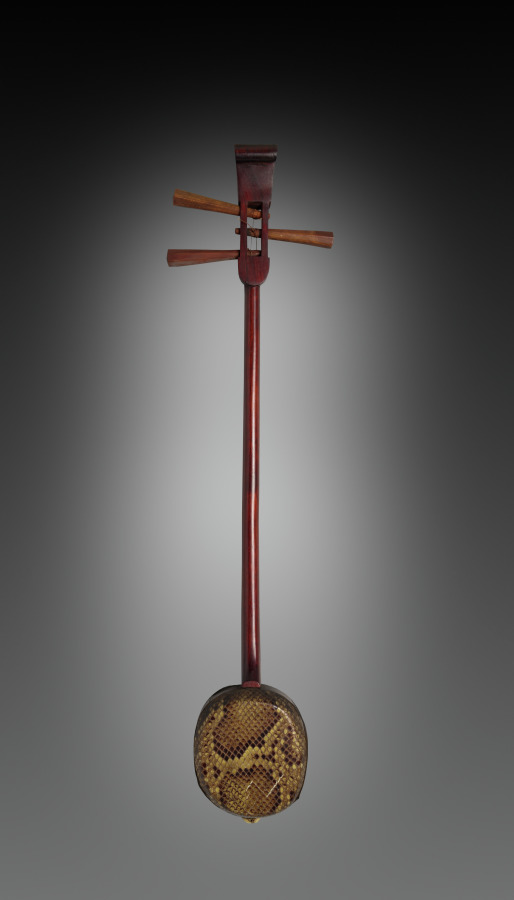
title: Sanxian (Three-Stringed Guitar)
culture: China, Qing dynasty (1644-1911)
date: 1800s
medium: wood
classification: Musical Instrument